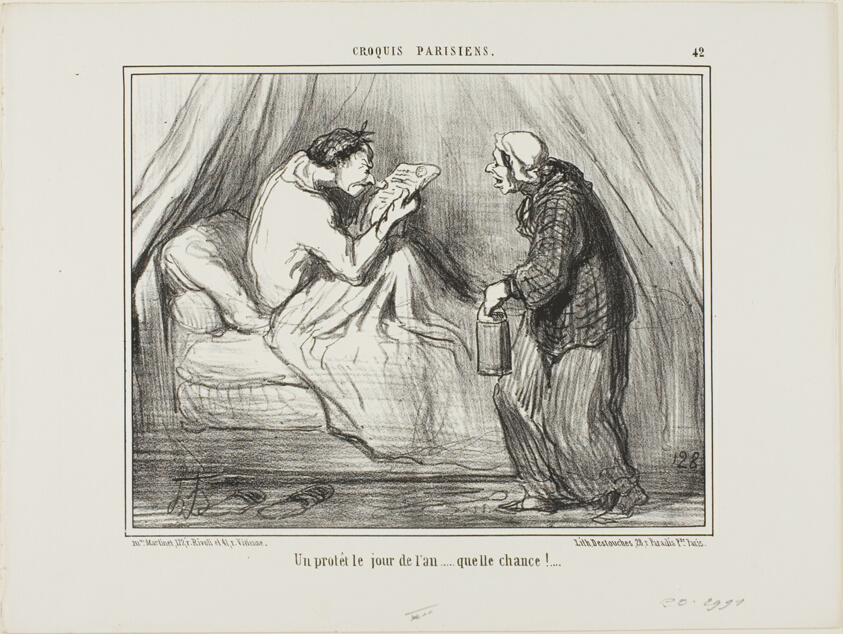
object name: Print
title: “A protest on New Year's Day! What luck! ...........,” plate 42 from Croquis Parisiens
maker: Honoré Victorin Daumier; French, 1808-1879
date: 1857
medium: Lithograph in black on white wove paper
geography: France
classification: lithograph; print; prints and drawing